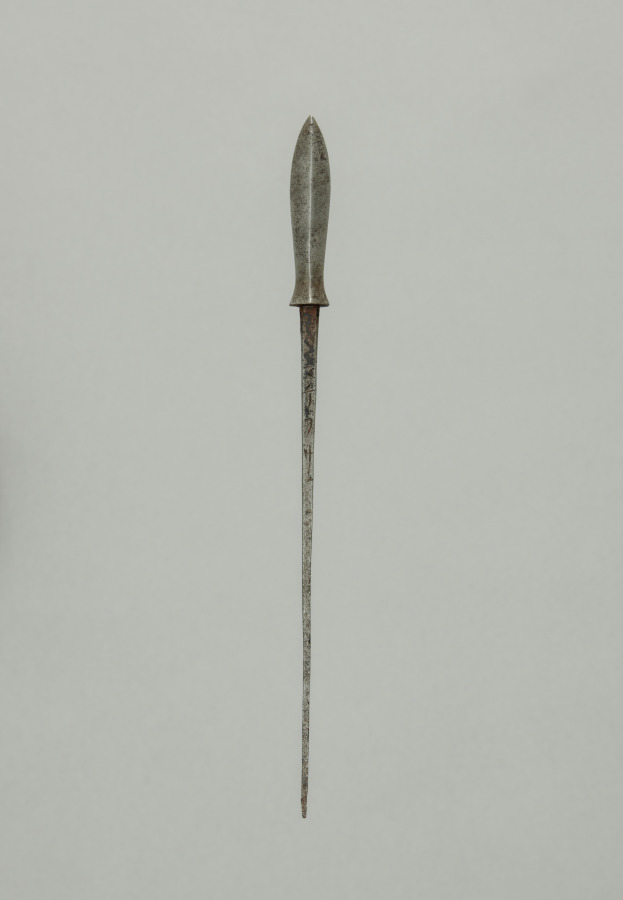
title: Arrow Point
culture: Japan, Edo period (1615–1868)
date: 1700s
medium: steel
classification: Arms and Armor